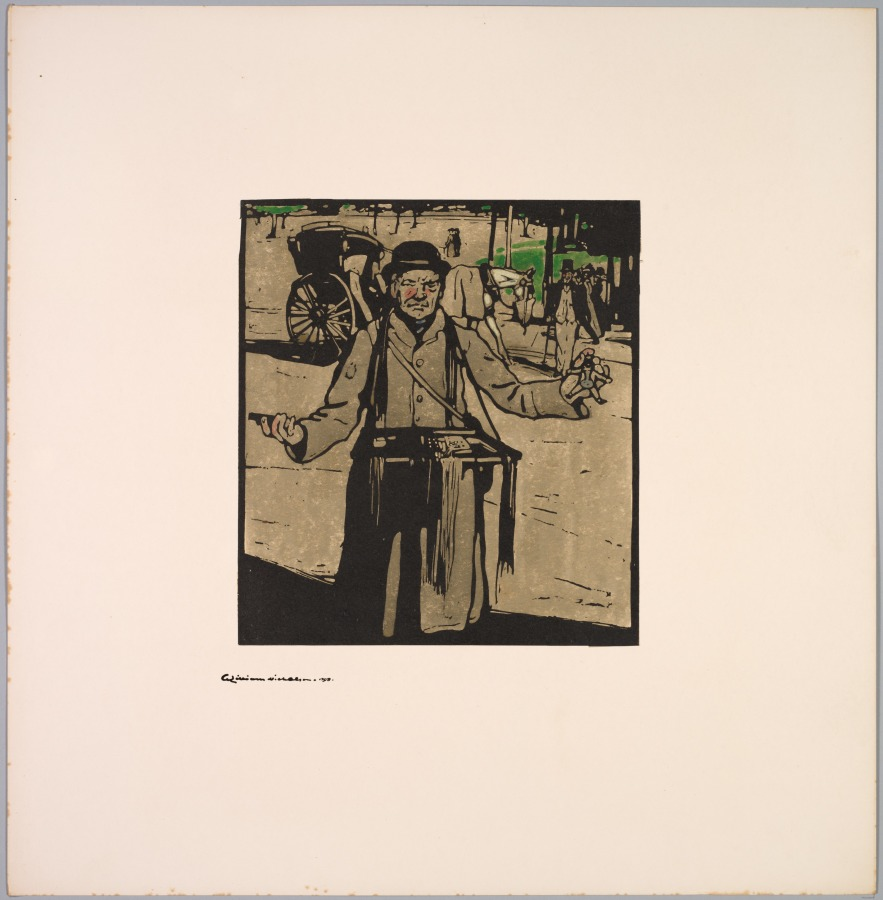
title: London Types: Hawker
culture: England, 19th century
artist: William Nicholson (British, 1872–1949)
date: 1898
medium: woodcut hand-colored with watercolor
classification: Print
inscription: lower left margin, in black ink: William Nicholson - 1898 -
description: At the turn of the last century, civic pride inspired stories, songs, poems, and images of London and its people—both noble and humble. William Nicholson personified Londoners, such as hawkers selling trinkets, with his London Types. The series proved so popular that William Ernst Henley composed poems to accompany each print. Tourists could imagine encountering each of Nicholson's characters, from the barmaid to the beefeater, and locals could say, "I know him."